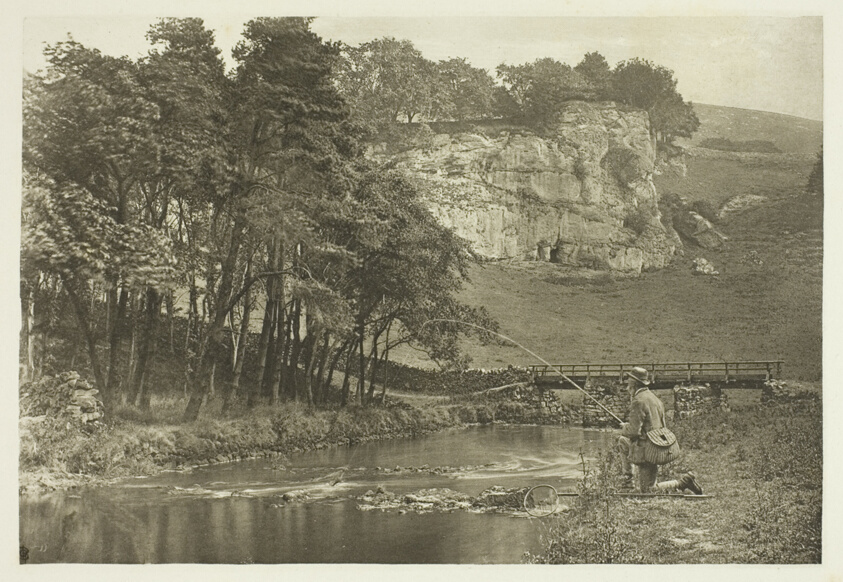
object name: Photograph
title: Wolfscote Bridge and Franklyn Rock, Beresford Dale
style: 19th century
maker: Peter Henry Emerson (English, born Cuba, 1856–1936)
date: 1880s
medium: Photogravure, plate LIV from the album "The Compleat Angler or the Contemplative Man's Recreation, Volume II" (1888)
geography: England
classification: photogravure; photomechanical process; photography; photograph